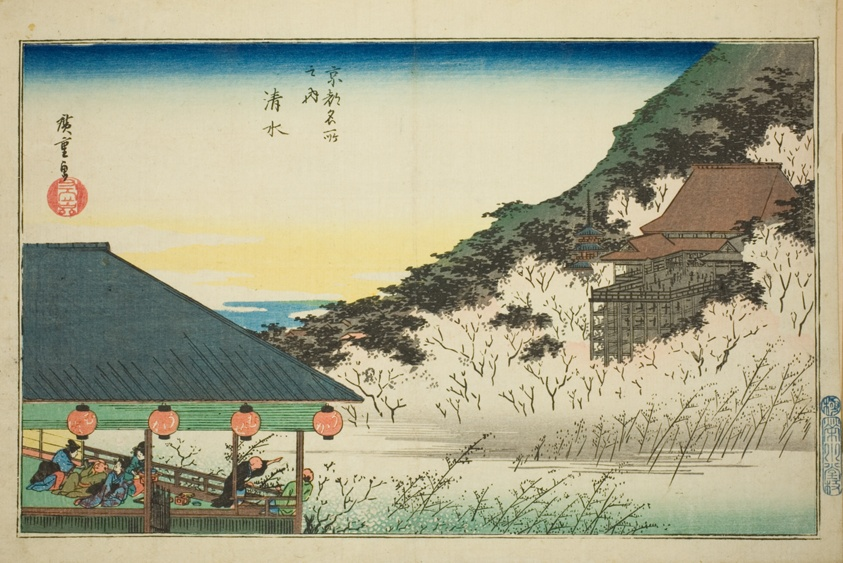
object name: Print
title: Kiyomizu Temple, from the series "Famous Places in Kyoto (Kyoto meisho no uchi)"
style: Japanese (culture or style)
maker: Utagawa Hiroshige 歌川 広重; Japanese, 1797-1858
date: c. 1834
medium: Color woodblock print; oban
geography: Japan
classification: woodblock print; print; asian art